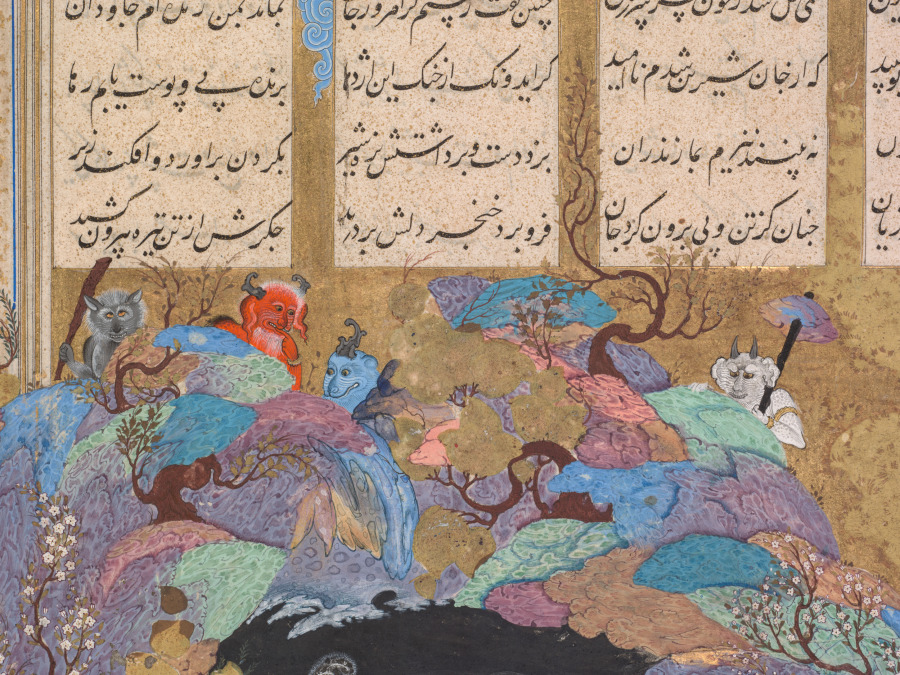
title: Rustam's seventh course: He kills the White Div, folio 124 from a Shah-nama (Book of Kings) of Firdausi (Persian, about 934–1020)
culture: Iran, Tabriz, Safavid period (1501-1722)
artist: attributed to Abd al-Vahhab (Persian, active about 1516)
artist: attributed to Mir Musavvir (Iranian, c. 1510–1555)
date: 1522–37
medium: Gum tempera, ink, gold, and silver on paper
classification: Manuscript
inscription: Script: Nasta'liq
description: The legendary hero Rustam brutally takes the demon chief’s liver blood, needed to cure his king of blindness. Paintings from the Shah-nama made for the Persian ruler Shah Tahmasp (reigned 1524–76) were acclaimed in their day for their brilliant coloring and refinement. Seven of the artists who contributed to this book moved to India to lead the new Mughal painting workshop in the 1550s. They introduced to the Indian artists a more complex color sensibility and preference for presenting faces in three-quarter view, as opposed to in profile.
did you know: Devils in the details: three peer into the White Div’s lair by the Caspian Sea.